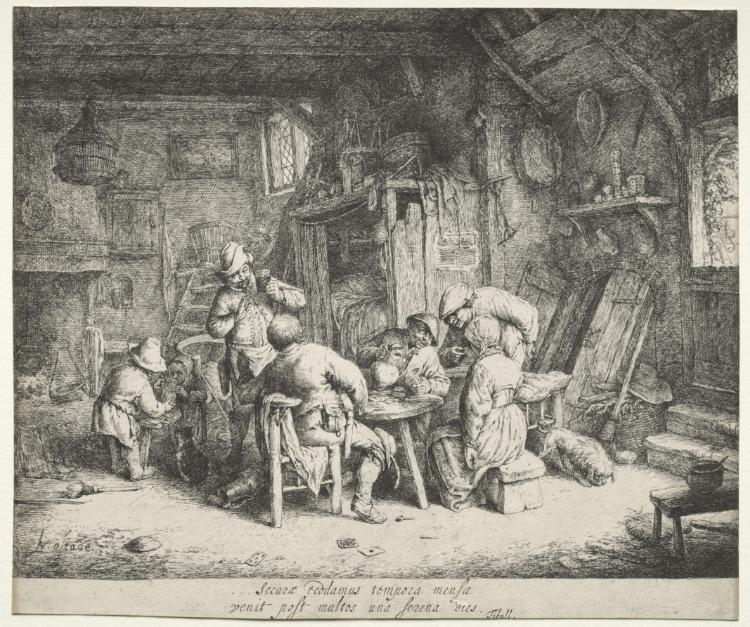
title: The Breakfast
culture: Netherlands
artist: Adriaen van Ostade (Dutch, 1610–1684)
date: c. 1664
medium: etching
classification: Print